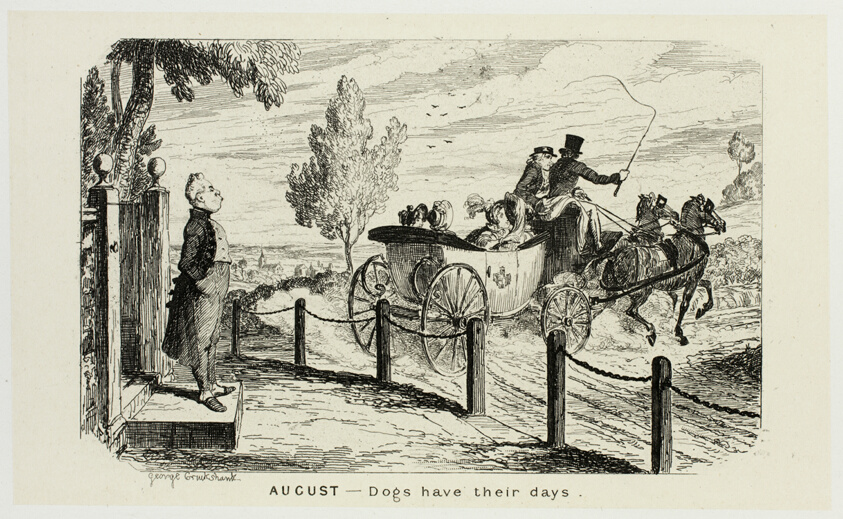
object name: Print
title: August - Dogs Have Their Days from George Cruikshank's Steel Etchings to The Comic Almanacks: 1835-1853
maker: George Cruikshank (English, 1792-1878); published by Pickering & Chatto (English, 19th century)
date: 1839, printed c. 1880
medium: Steel etching in black on cream India paper, laid down on off-white card (chine collé)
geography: England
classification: etching; paper; steel; print; prints and drawing